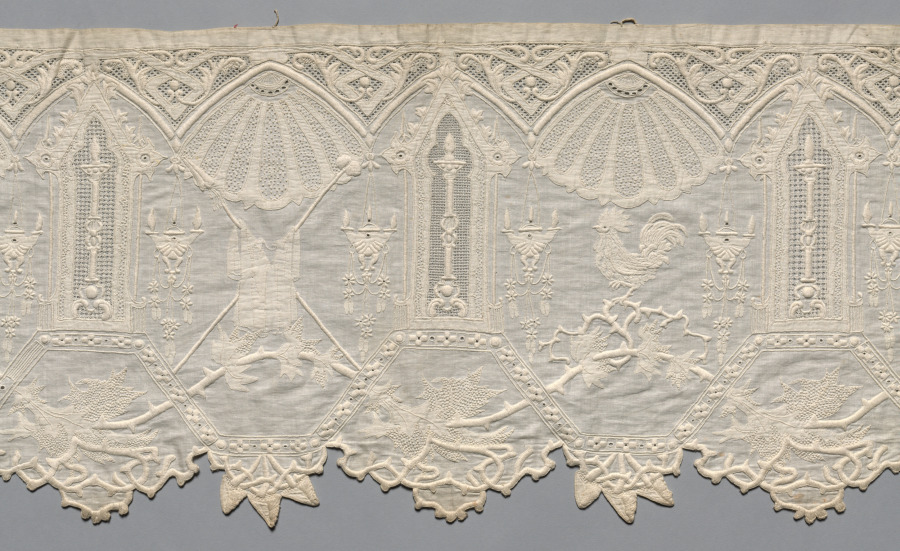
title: Altar Cloth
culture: Italy(?)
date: 1800s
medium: Plain weave cotton: needle lace (drawnwork), appliqué, and embroidery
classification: Embroidery